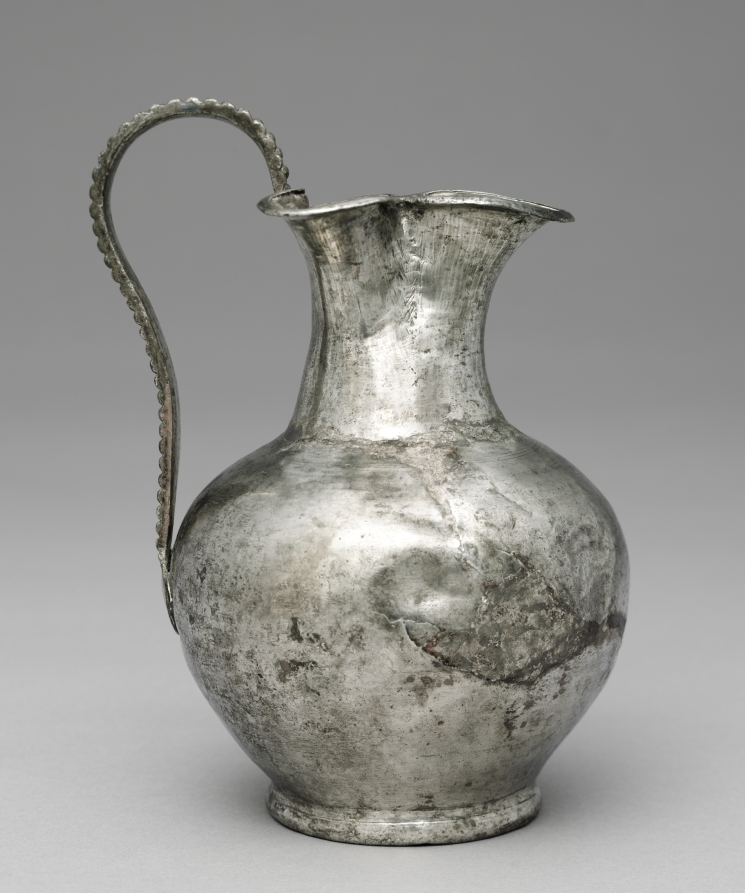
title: Ewer with a Trefoil (Three-Part) Spout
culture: Byzantium, Syria(?), Byzantine period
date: 300–600 CE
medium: silver with niello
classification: Metalwork